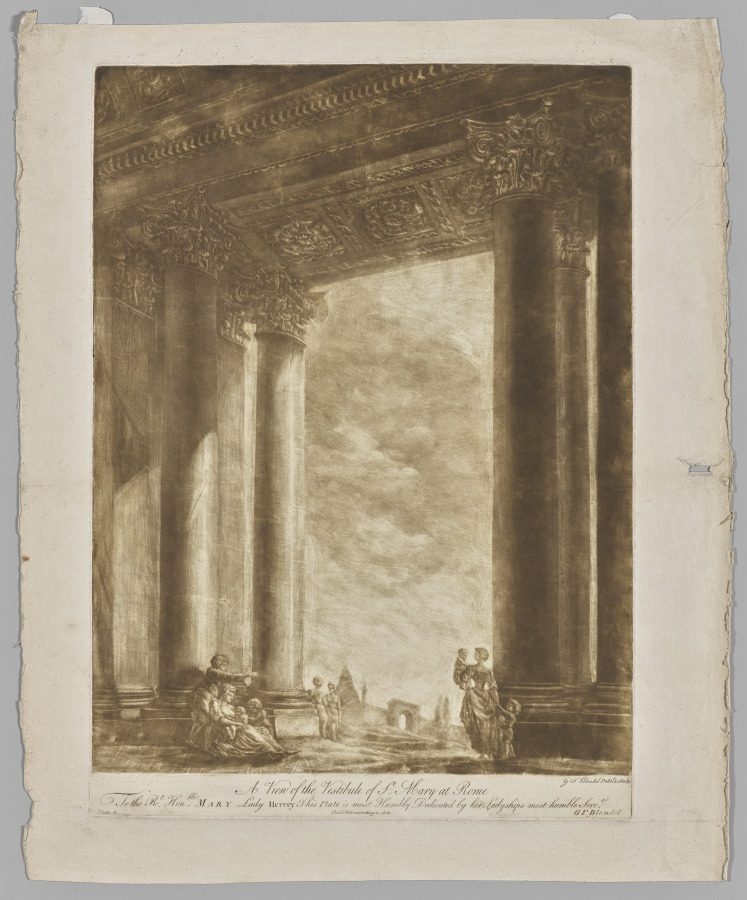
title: A View of the Vestibule of Saint Mary at Rome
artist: Georges Francois Blondel (French, 1730–1800)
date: 1766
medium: mezzotint printed in sepia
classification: Print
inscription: Imprinted on recto: “A View of the Vestibule of St. Mary at Rome”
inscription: Imprinted on recto: “G F Blondel Delin’t & Sculpt”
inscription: Imprinted on recto: “TO the Rt Hon’ble Mary Lady Hervy This Plate is most Humbly Dedicated by her Ladyships most humble Serv’t/Published according to Act/G F Blondel/Plate 4”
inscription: Watermark: Grand-Jésus stock of T. Dupuy, watermark Name of Jesus (IHS), countermark T Dupuy Fin Auvergne 1742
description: After returning from several years spent in Italy, the French printmaker George-Francois Blondel settled in London in order to take advantage of the English taste for images of Italian sites. This is one of a series of eight prints he published in 1766 depicting imagined and real Italian interiors. Using the relatively new technique of mezzotint, which creates velvety, dark tonal areas, as well as low vantage points, Blondel created towering, awe-inspiring spaces. For special patrons, he printed the plates in sepia ink, rather than in black; the CMA’s set includes two of these unusual sepia impressions.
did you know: Mezzotint was relatively new at the time this print was made and had yet to be utilized for such large plates of an architectural nature as seen here.